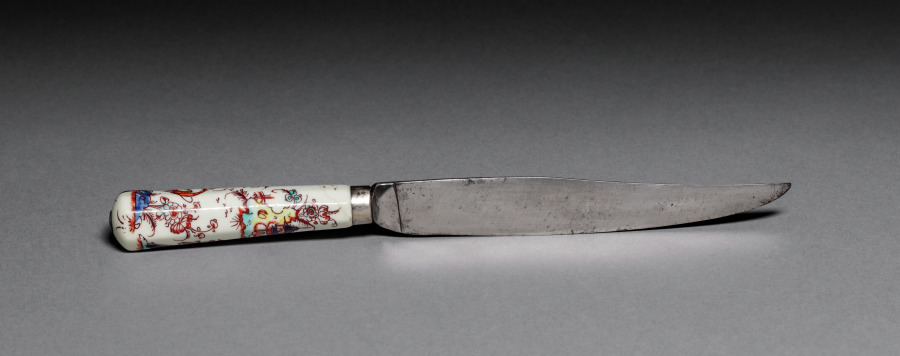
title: Knife Handle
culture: France, 18th century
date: 1725–1750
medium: soft paste porcelain, steel blade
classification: Ceramic